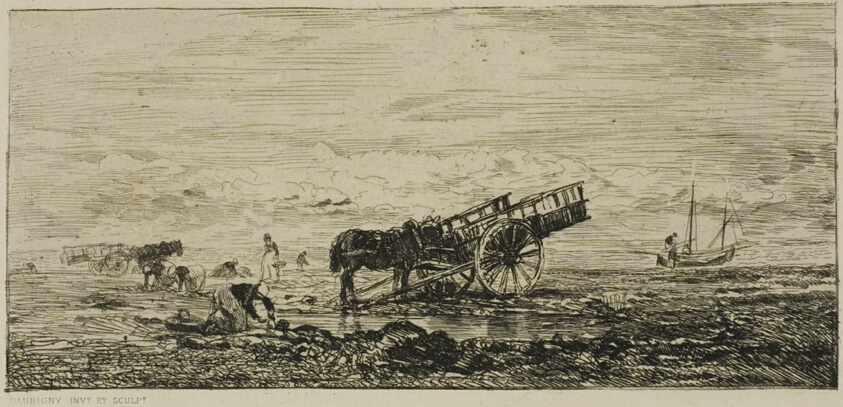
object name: Print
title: Beach at Villerville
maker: Charles François Daubigny (French, 1817-1878)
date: 1855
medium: Etching on cream Japanese paper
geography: France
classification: etching; print; prints and drawing